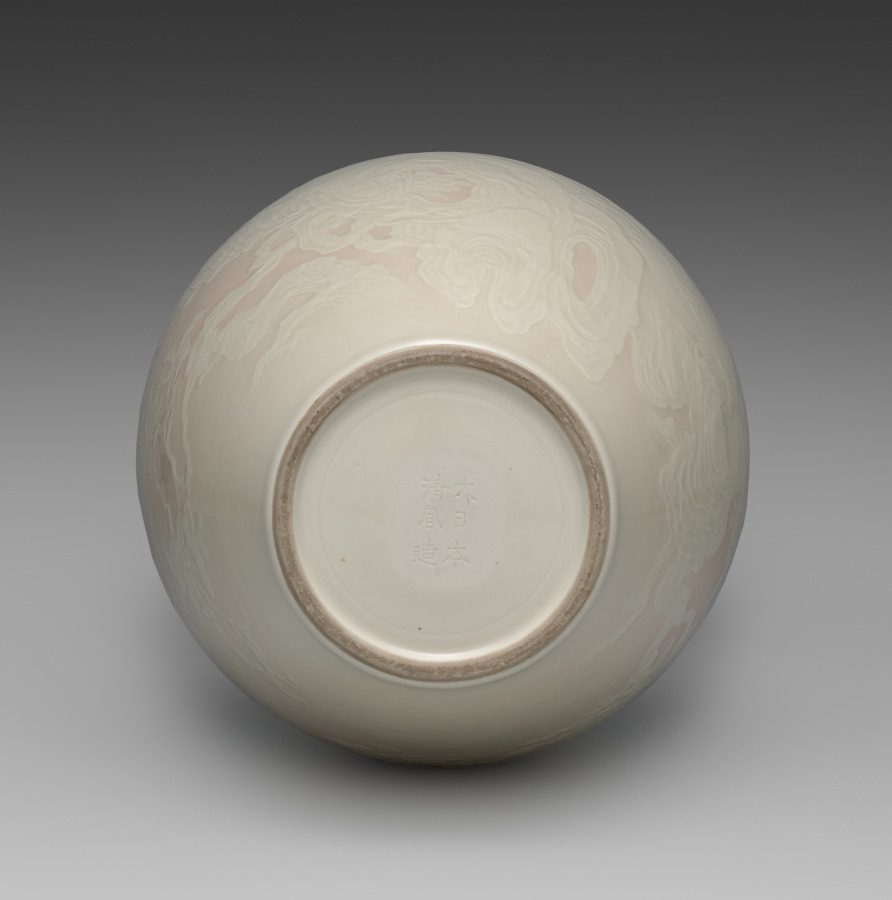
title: Pheasants in Cherry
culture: Japan, Meiji period (1868–1912)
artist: Seifū Yohei III (Japanese, 1851–1914)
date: 1900–1914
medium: Porcelain with molded and carved design, underglaze color, and cream glaze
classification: Ceramic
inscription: 大日本清風造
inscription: 清風製之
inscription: 清風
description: Like the design of Flower Vase with Phoenix in Paulownia (CMA 2022.199), the pair of pheasants in a dramatic landscape setting on this vase was created by adding clay to the surface of the clay body and then molding and carving it. Here, instead of a typical white clay, Yohei III has used an ivory clay. He then added gradated pink around the complex design, which with its multitude of cherry blossoms must have been painstaking to mask with precision. For the birds’ eyes, he added a touch of yellow. He then fired the vase with an allover translucent cream glaze. The resulting kanpakuji piece is one in which an academic subject long favored by painters of the Kano school for screen and sliding door paintings in important buildings, that of impressively sized birds within a scene of precipitous, angled rock faces and twisting trees, is made soft and ethereal while retaining a sense of gravitas.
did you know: The unusually large scale of this piece and the fact that he signed the base “Made by Seifū of Great Japan” also suggest that it was made for public display.